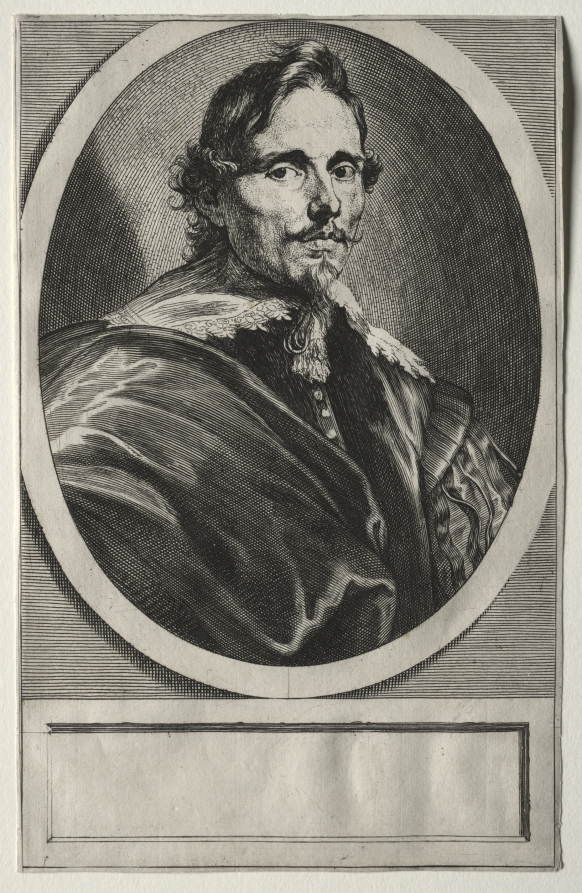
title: Philippe Le Roy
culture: Flanders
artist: Anthony van Dyck (Flemish, 1599–1641)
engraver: Paulus Pontius (Flemish, 1603–1658)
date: 1630–33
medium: Etching and engraving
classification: Print